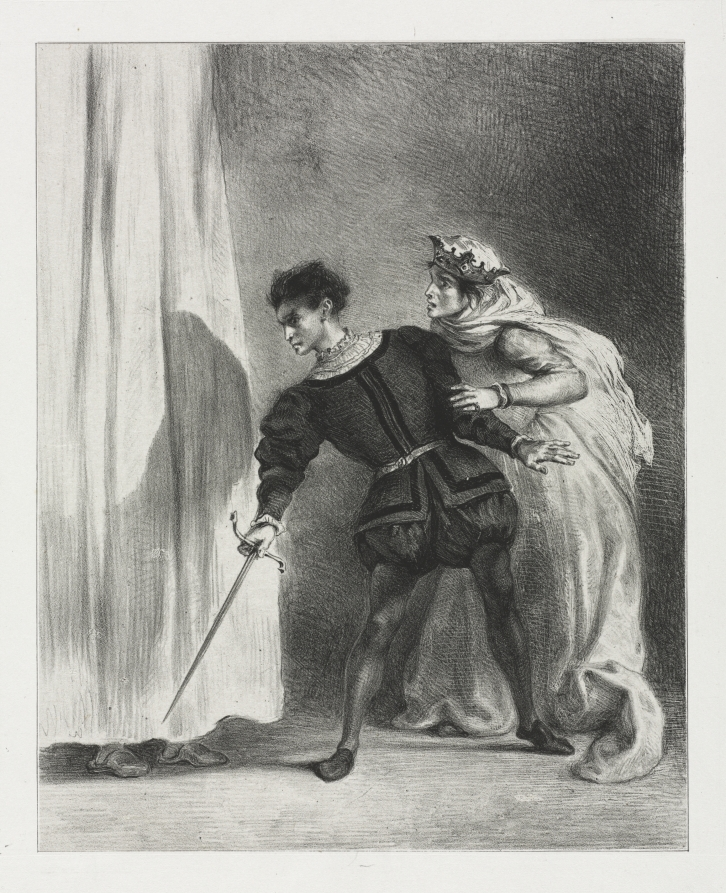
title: Hamlet: The Murder of Polonius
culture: France, 19th century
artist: Eugène Delacroix (French, 1798–1863)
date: 1834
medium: lithograph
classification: Print